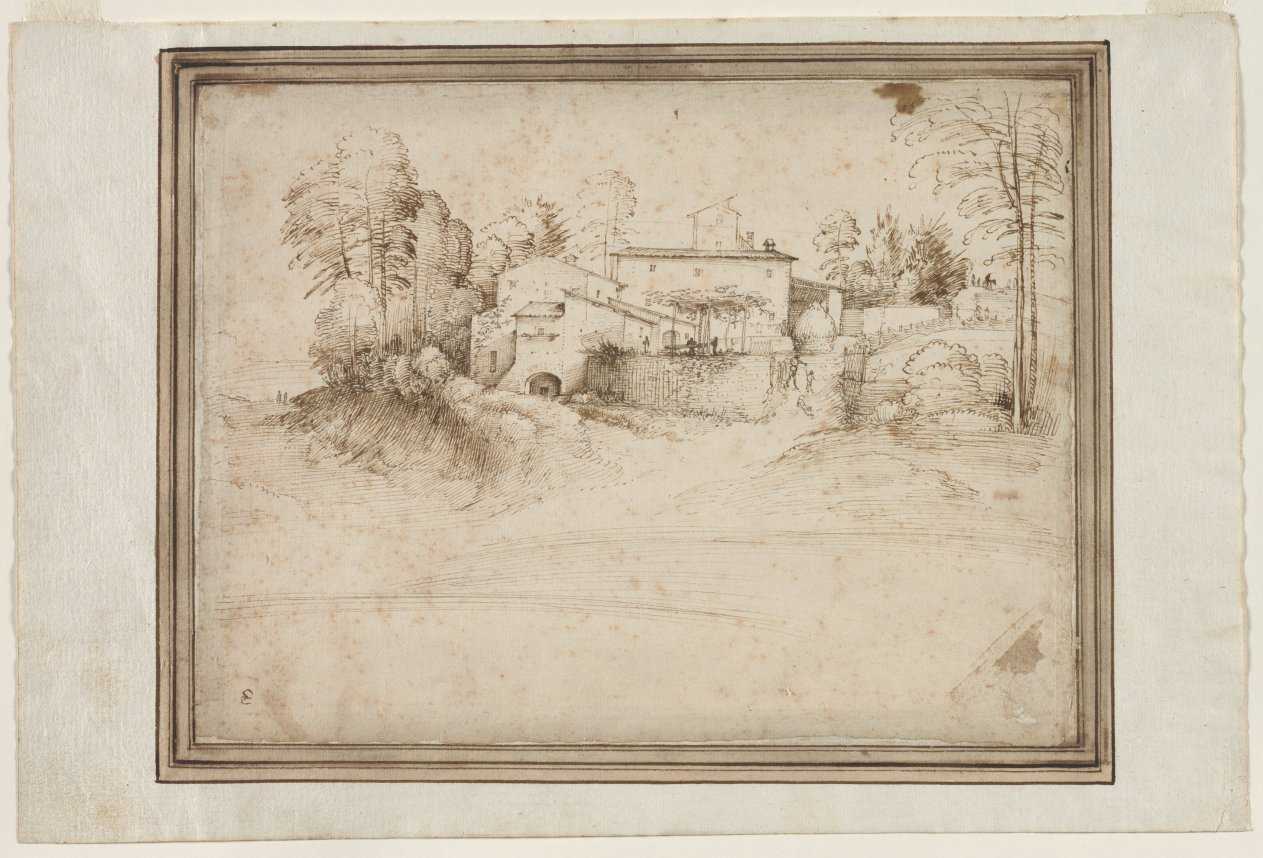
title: Farmhouse on the Slope of a Hill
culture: Italy, Florence, 15th century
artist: Fra Bartolommeo (Italian, 1472–1517)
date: c. 1508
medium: pen and brown ink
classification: Drawing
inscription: a bird in ink lower left recto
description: This is a significant early example of pure landscape drawing in Europe, as it is dedicated completely to the depiction of nature for its own sake, without suggestion of a biblical or historical narrative. The rapidity and regularity of strokes used for the evergreen and deciduous trees and the sweeping lines in the foreground suggest that the landscape in Farmhouse on the Slope of a Hill was made directly from nature. The sheet comes from an album of 41 landscape studies by Fra Bartolommeo assembled by an eighteenth-century collector and disbound for sale in the mid-20th century. A member of the Dominican Order, Fra Bartolomeo likely produced these drawings during his travels in and around Florence, often to Dominican establishments.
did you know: The artist who made this drawing, Fra (brother) Bartolommeo, left his successful Florentine artistic studio in 1500 and renounced painting in order to join the Dominican Order.